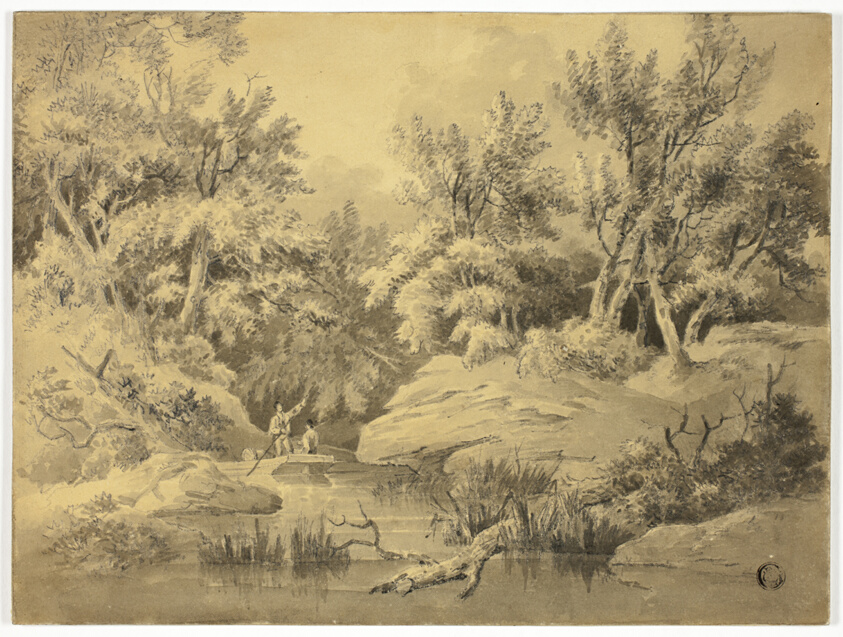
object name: Drawing and Watercolor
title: Two Figures Punting on Woodland Stream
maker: Attributed to William Henry Pyne; English, 1769-1843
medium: Graphite, and brush and gray wash, on tan wove paper, laid down on cream card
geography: England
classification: ink or chalk wash; drawings (visual works); prints and drawing